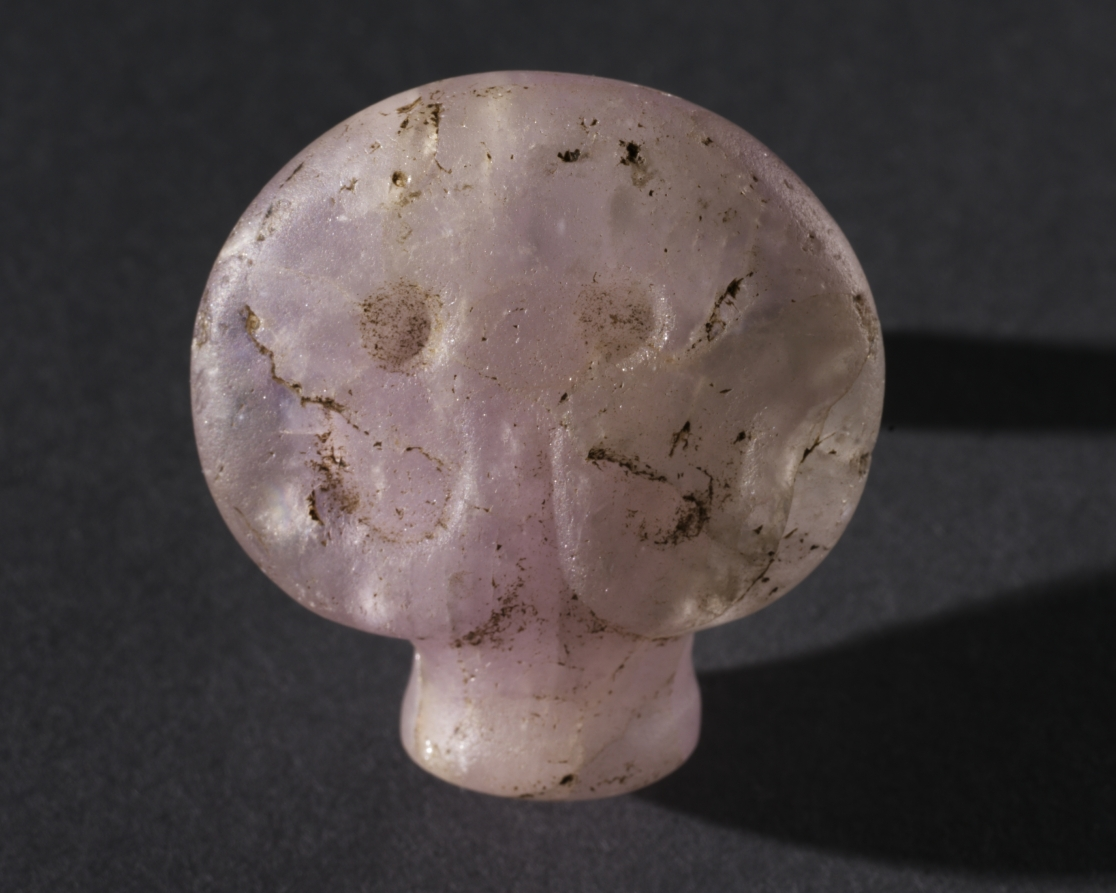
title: Bull's-Head Amulet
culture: Egypt, Predynastic (5000–2950 BCE), Naqada II–III (3650–3000 BCE)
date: c. 3500–2950 BCE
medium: amethyst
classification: Amulets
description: This stunning amethyst amulet takes the shape of the head of a bull, an animal renowned from the earliest times in Egypt for its natural strength. The image presented is abstract, with only the most important of the animal features being represented: horns that curl downward in low relief, large eyes, and a narrow, cylindrical snout. The back is pierced horizontally for suspension. A well known but rare type, the bull's head amulet is also one of the earliest of all amulets from ancient Egypt, datable to the Predynastic period (4000–3000 BC). The outstanding composition and luxuriant violet hue of this example single it out as one of the very finest of its kind.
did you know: In ancient Egypt the symbol of a bull, when worn or held, was believed to offer protection and increase fertility.